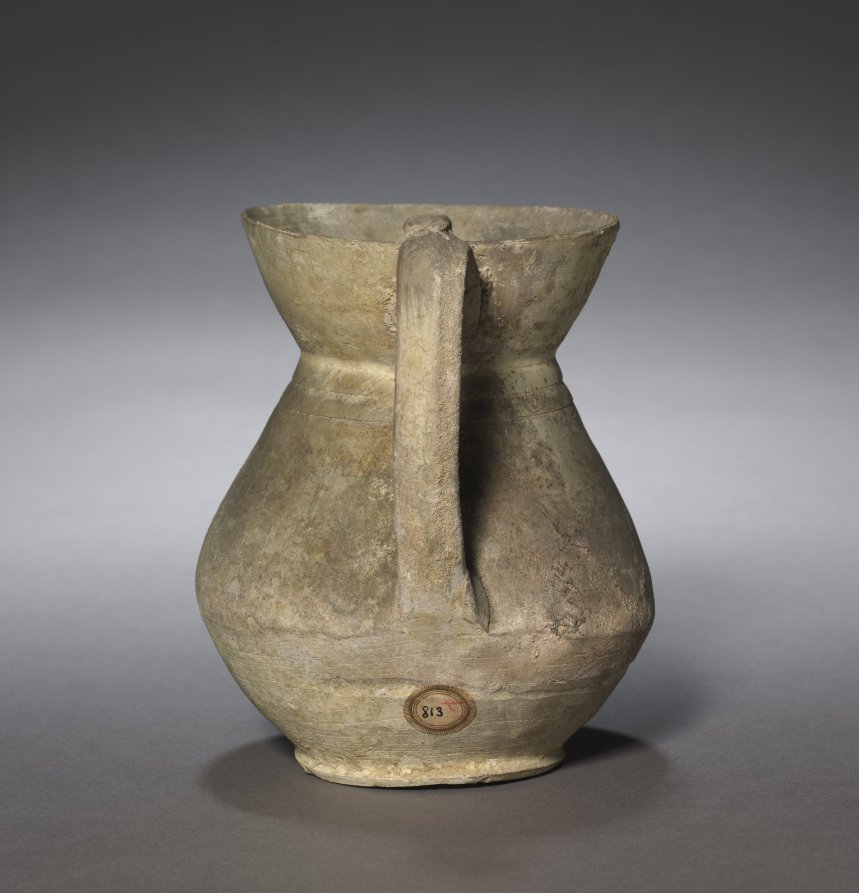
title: Jug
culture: Iran, Samanid period, 900s–1100s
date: 900s–1100s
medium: earthenware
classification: Ceramic